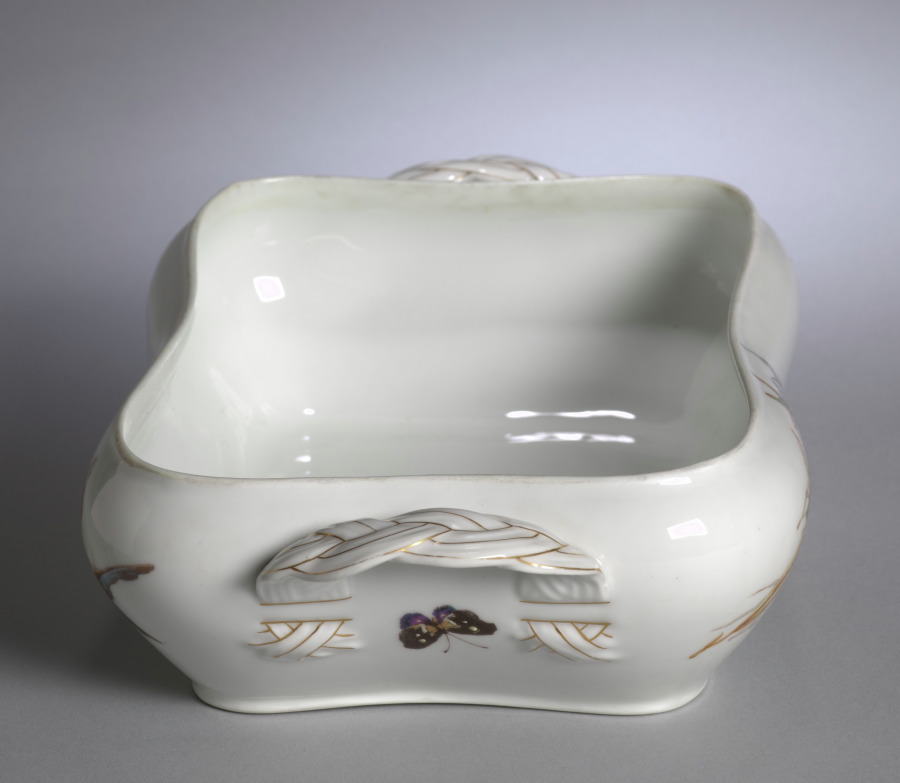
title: Vegetable Bowl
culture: France, Limoges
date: c. 1890–1910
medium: porcelain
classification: Ceramic